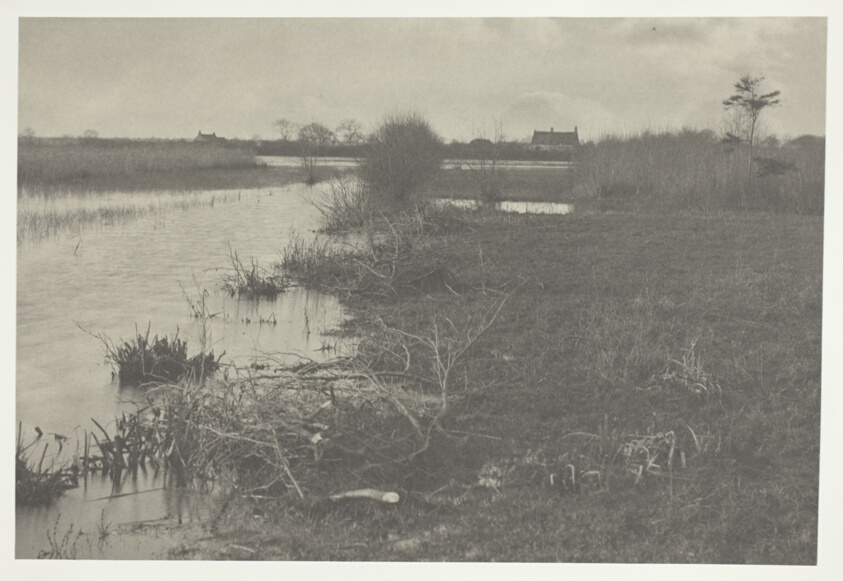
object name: Photograph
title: An Autumn Morning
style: 19th century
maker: Peter Henry Emerson (English, born Cuba, 1856–1936)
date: 1886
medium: Platinum print, pl. XXXVIII from the album "Life and Landscape on the Norfolk Broads" (1886)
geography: England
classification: platinum print; photographic process; photography; photograph